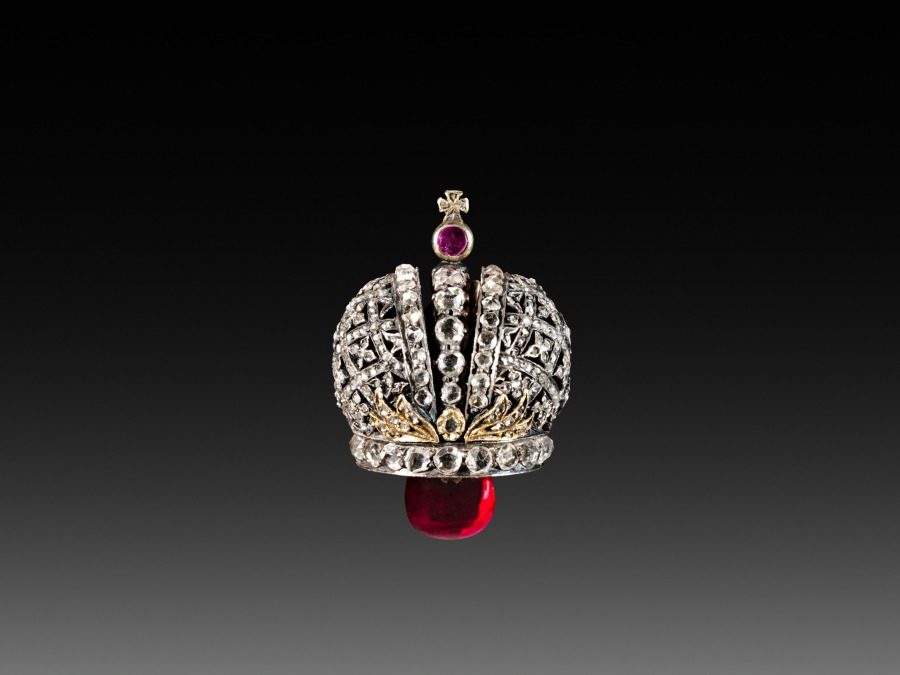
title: Miniature Crown Surprise from the Lapis Lazuli Easter Egg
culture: Russia, St. Petersburg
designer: attributed to Peter Carl Fabergé (Russian, 1846–1920)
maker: attributed to House of Fabergé (Russian, 1842–1918)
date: c. 1885–90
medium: gold, enamel, lapis lazuli, pearls, diamonds, rubies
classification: Miscellaneous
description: This Easter egg, like the subsequent ones produced by Fabergé for the imperial family, contains a surprise when opened. In this case, the egg opens to display a yellow enameled cover, resembling an egg yolk, which then opens to reveal a tiny replica of the Russian imperial crown, containing either a ruby or a pink sapphire suspended on a chain.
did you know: The tiny diamond encrusted crown surprise is a replica of the Russian imperial crown made for Empress Catherine the Great in the 1700s.